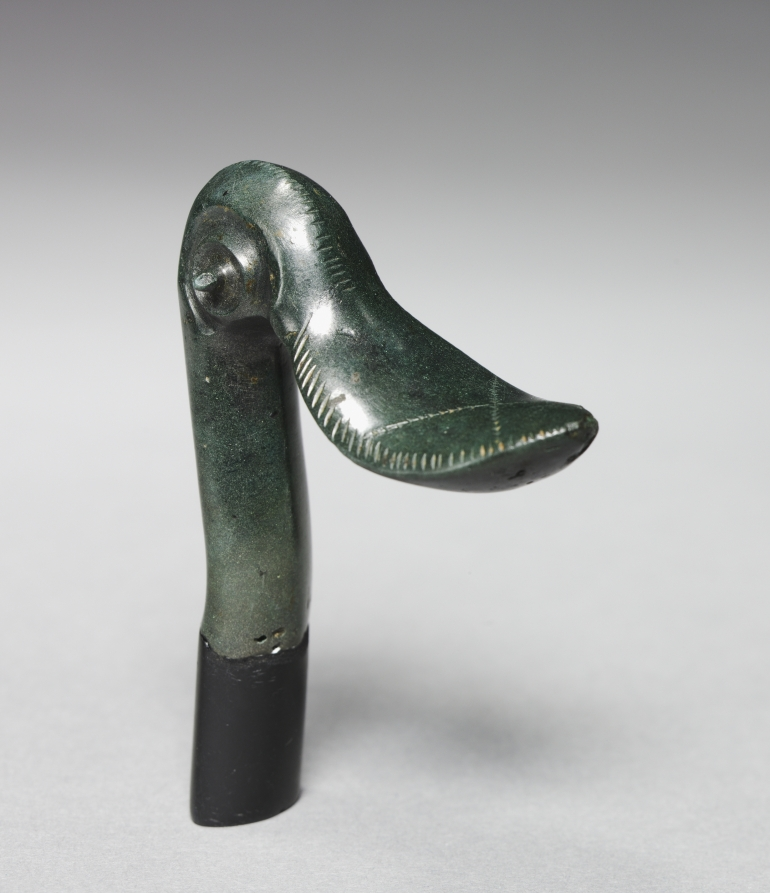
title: Duck Head Finial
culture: possibly Hungary, Bronze Age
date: c. 1400–1300 BCE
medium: bronze, cast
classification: Sculpture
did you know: A decorative object, this duck head finial likely topped a piece of furniture.